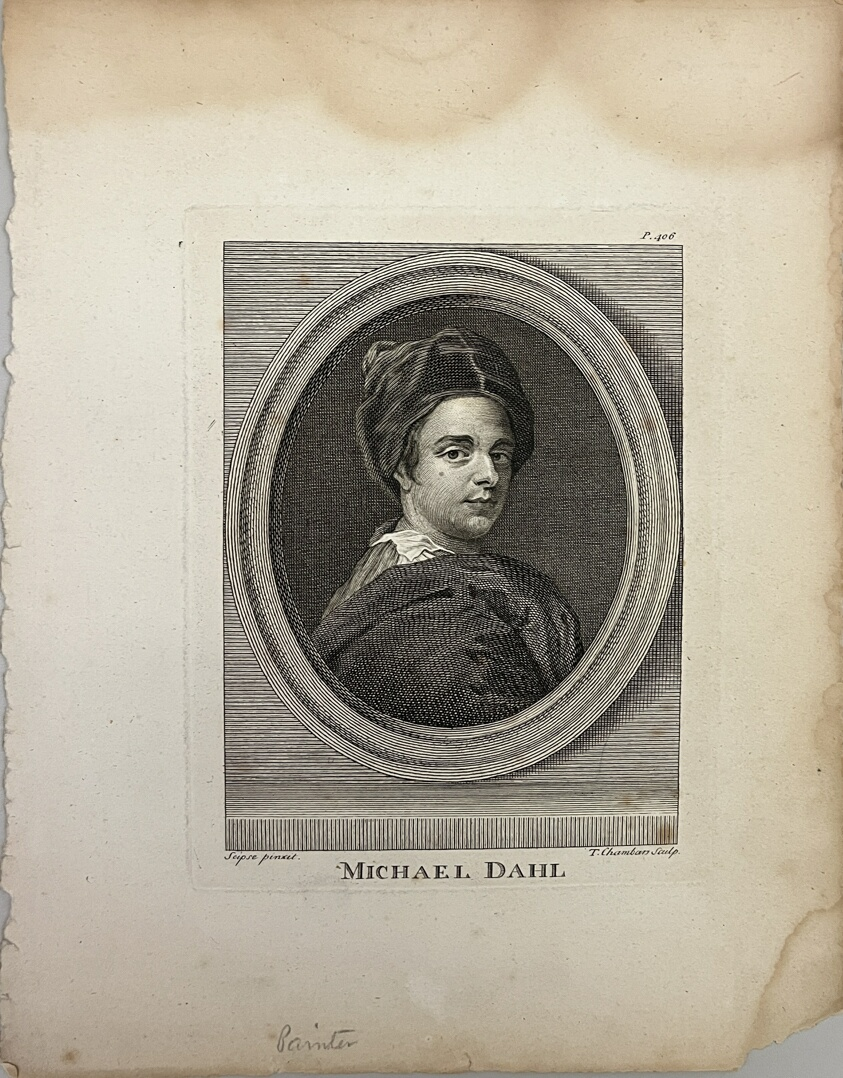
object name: Print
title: Michael Dahl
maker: Thomas Chambers [or Chambars] (British, c. 1724-1789)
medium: Etching and engraving on paper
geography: United States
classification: reproduction; print; prints and drawing